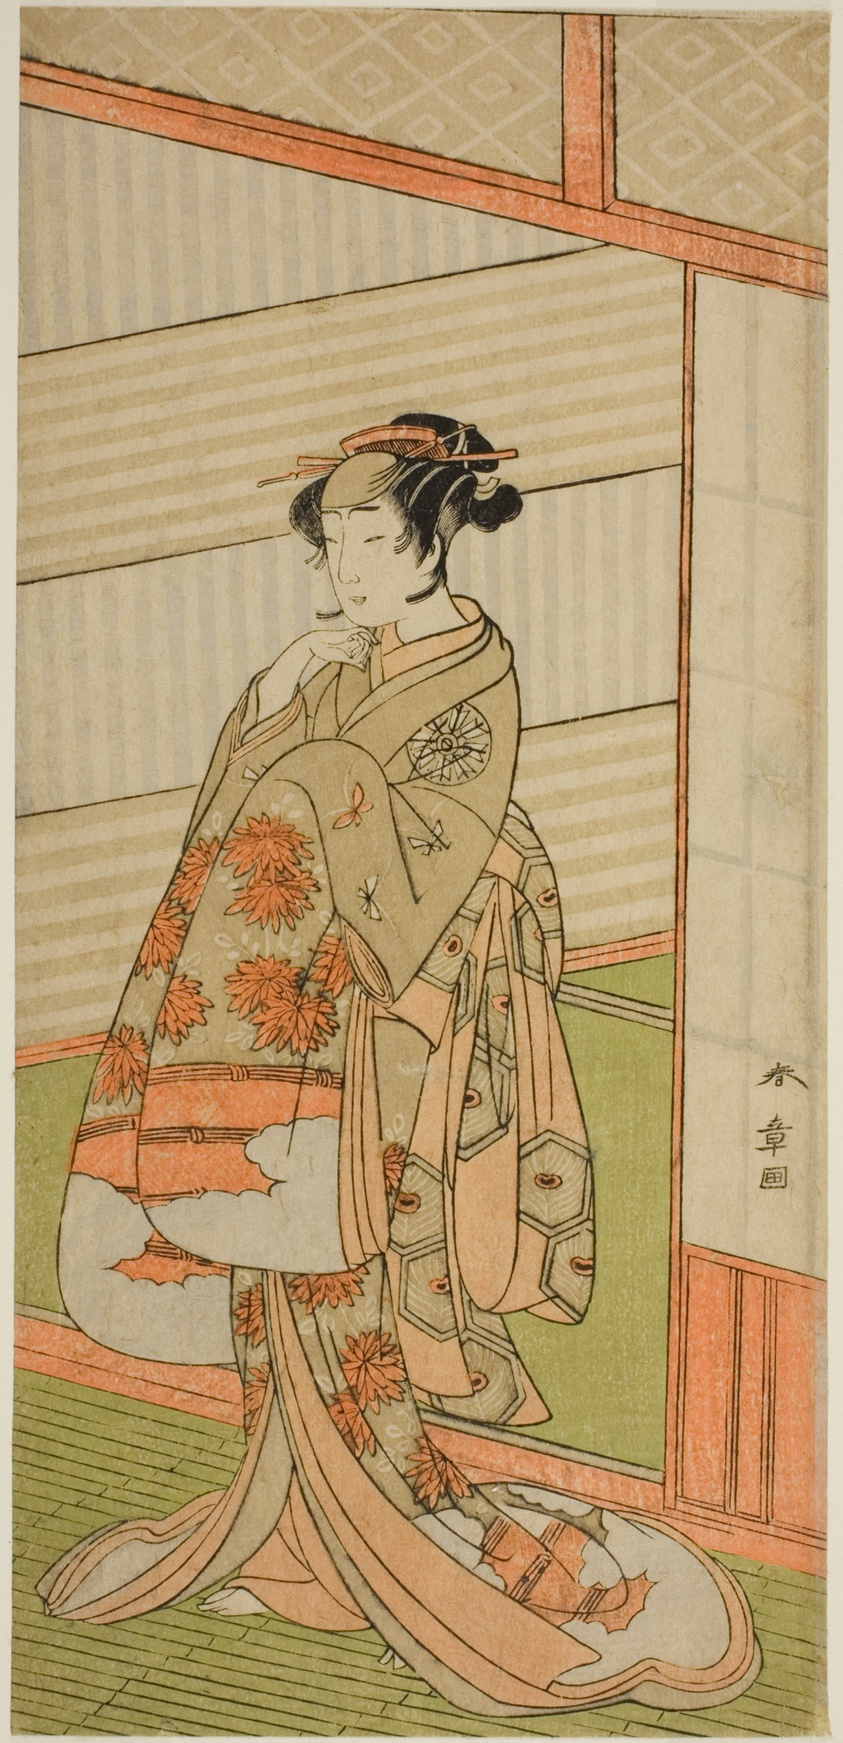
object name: Print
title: The Actor Nakamura Noshio I in an Unidentified Role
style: Japanese (culture or style)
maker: Katsukawa Shunsho 勝川 春章; Japanese, 1726-1792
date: c. 1772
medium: Color woodblock print; hosoban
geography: Japan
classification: woodblock print; print; asian art